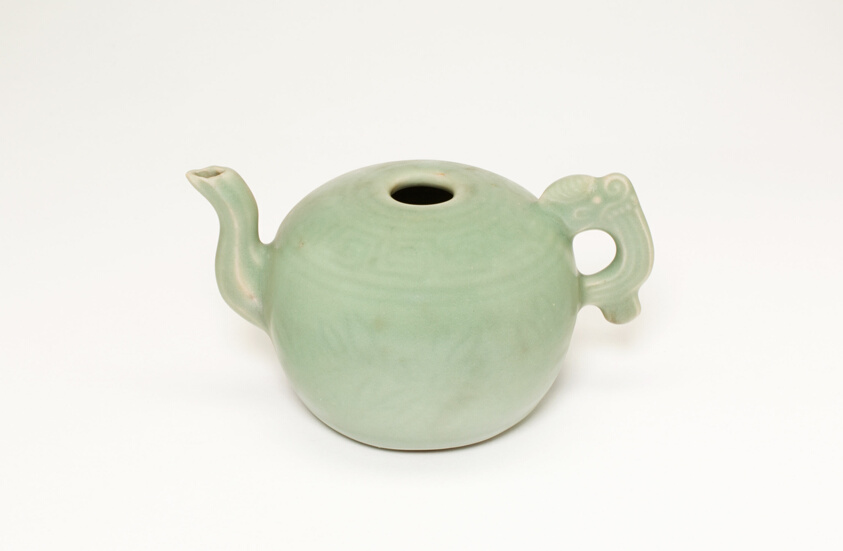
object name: Decorative Arts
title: Ewer with Animal Handle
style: Chinese (culture or style)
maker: China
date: Yuan dynasty (1271–1368), 14th century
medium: Longquan ware; celadon-glazed stoneware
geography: China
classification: ewer (vessel); vessel; porcelain; asian art; ceramics; decorative arts